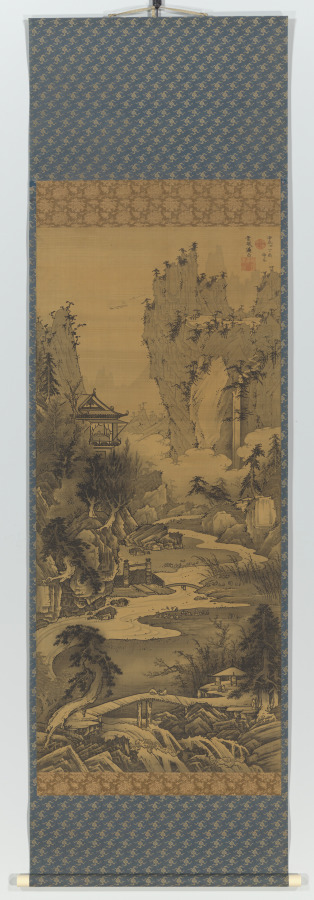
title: Orchid Pavilion Gathering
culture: Japan, Edo period (1615–1868)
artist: Soga Shōhaku (Japanese, 1730–1781)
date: 1777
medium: hanging scroll; ink on silk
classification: Painting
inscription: Inscribed upper right: Sixth year of An'ei (1777) mid-winter, Soga Shohaku Seal: Dasokken Shohaku Seal: Unread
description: This painting depicts a famous gathering that took place in China in AD 353 to celebrate the Spring Purification Festival, also known as the Double Third Festival, as it takes place on the third day of the third lunar month. The host invited everyone to the Orchid Pavilion to compose poetry and drink wine. Guests floated wine cups down a nearby creek, and where they landed, people had to drink the wine and compose a poem.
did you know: The Buddhist temple Bairinji in Kurume City, Fukuoka prefecture, Japan, and the National Gallery of Victoria in Melbourne, Australia, own compositions by the same artist on the same theme.